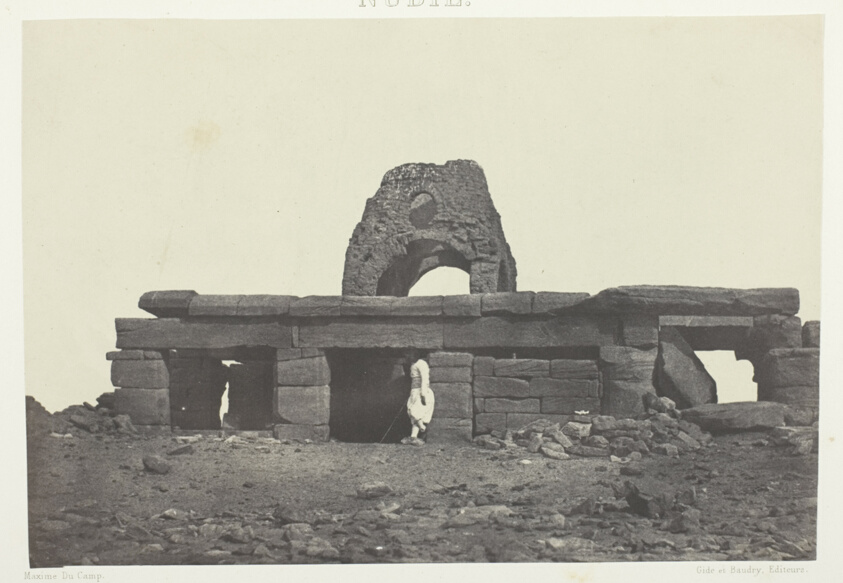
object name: Photograph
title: Temple d'Amada; Nubie, plate 99 from the album "Egypte, Nubie, Palestine et Syrie" (1852)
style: 19th century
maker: Maxime Du Camp (French, 1822–1894)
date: 1849/51, printed 1852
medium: Salted paper print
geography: France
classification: salted paper print; photographic process; photography; photograph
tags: Collected by Hugh Edwards, Egypte, Nubie, Palestine et Syrie